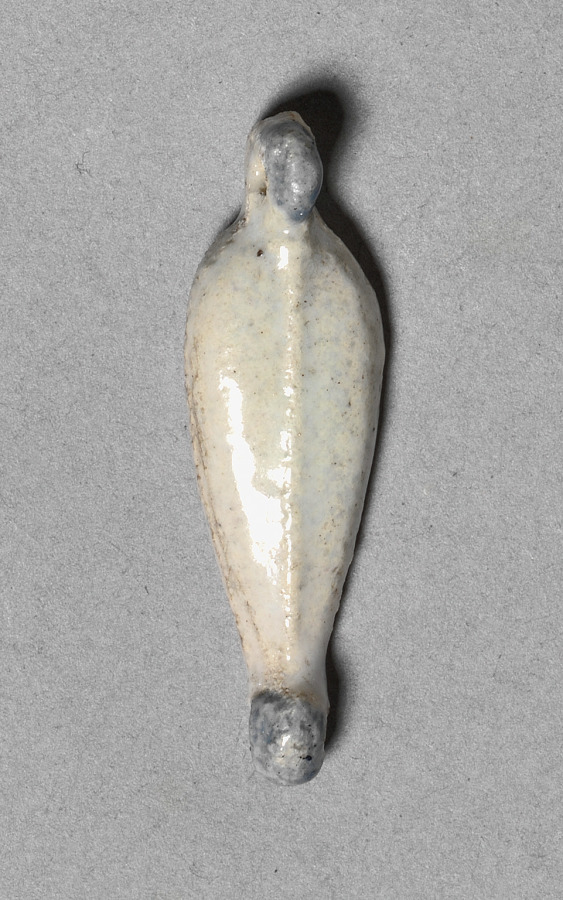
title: Petal-Shaped Bead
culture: Egypt, New Kingdom (1540–1069 BCE), Dynasty 18, reign of Amenhotep III (1390–1352 BCE)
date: c. 1391–1353 BCE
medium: faience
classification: Jewelry